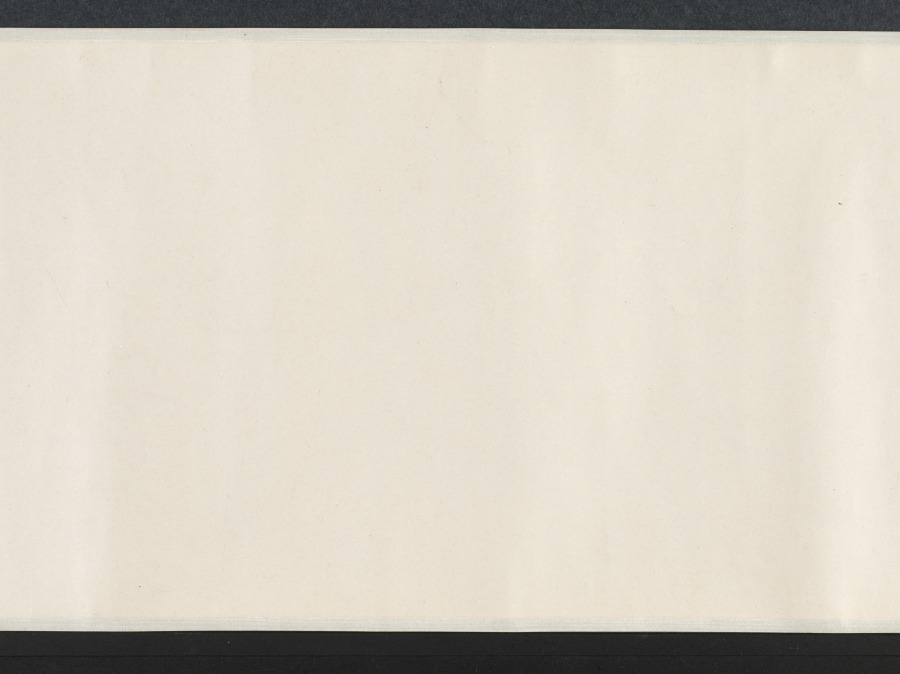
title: Nine Songs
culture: China, Yuan dynasty (1271-1368)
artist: Zhang Wo (Chinese, active c.1336–after 1364)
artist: Chu Huan (Chinese, active 1361)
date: 1361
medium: handscroll; ink on paper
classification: Painting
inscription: 7 colophons and 47 seals: 1 colophon, dated 1361, and 28 seals of Chu Huan 褚奐 (active c. 1361); 1 colophon, dated 1785, and 1 seal of Lu Shihua 陸時化 (1714-1779); 2 seals of Lu Yü-ch'ing (18th c.); 1 colophon, dated 1935, of Ye Gongchuo 葉恭綽 (1881-1968); 1 colophon, dated 1935, of Wu Hufan 吳湖帆(1894–1968); 1 colophon, dated 1938, and 1 seal of Wang Tongyu 王同愈 (1856-1941); 1 colophon, dated 1941, of Wu Huayuan 吳華源 (1893-1972); 1 colophon, dated 1942, and 9 seals of Xu Bangda 徐邦達 (1911–2012); 1 colophon, dated 1942, of Lang Jingshan 郎靜山 (1892-1995); 1 colophon, dated 1944, of Tang Yun 唐雲 (1910-1993); 6 seals of Wang Jiqian [C.C. Wang] 王季遷 (1907–2003).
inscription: Text of The Nine Songs written by Chu Huan at the end of each section.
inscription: 右離騷九歌圖，宋龍溟居士李公本，淮南張渥叔厚所畫妙絕當世。家藏請予書其辭目識于左。至正二十一年辛醜三月旦河南褚奐記。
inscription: Colophon by Lu Shihua 陸時化 (1714–1789): This scroll is fortunate to have been handed down from collections of the right people. Now, after 500 years, its condition is as good as when it was painted. I acquired this from Mr. Shen Guiyu [1673-1769], the President of the Board of Rites. The label is in his handwriting when he was 95 years old. I submit that Chu Huan (t. Shiwen) of the Yuan Dynasty was a native of Qiantang. His "seal" and li writings are in the style of Wu Rui. For example, in [Chu Kuei's] Ming ji lu [A list of masterpieces] is recorded the stele commemorating the restoration of the prefectural school of Kun-shan, the text of which was composed by Yang Weizhen in the twenty-first year of Zhizheng [1361]; and the calligraphy as well as the title in li style was by Chu Huan, who was at that time an assistant judge of the prefecture of Haining in the circuit of Hangzhou. Zhang Wo's zi is Shuhou (叔厚). His literary name is Zhen Qisheng (贞期生). According to [Gu Ying's] Yu shan cao tang ya jii, he liked to paint in the bai-miao or the "pure delineation" style after the method of Li Longmian [Li Gonglin 李公麟], which finds no peer among the ancient masters. This is agreed upon [by Pei Ch'iung] in his Qing jiang zhi who praised [Zhang Wo] as being quite learned and well-versed in many branches of the arts, especially figure painting. Recorded by Lu Shihua [The mountain dweller], listening to the pine, in the twelfth month of the yisi year [1785].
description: Painted in the baimiao, or fine-line drawing style, this ancient work demonstrates the literati’s use of abstract calligraphic brushwork for self-expression. The subject of the “Nine Songs”—songs associated with shamanistic rituals in the ancient Chu kingdom—had traditionally provided artists with myths and legends that they could explore and reinterpret in their own works.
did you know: Divided into eleven sections, the scroll contains illustrations by painter Zhang Wu followed by a transcription of the relevant verse by calligrapher Chu Huan.